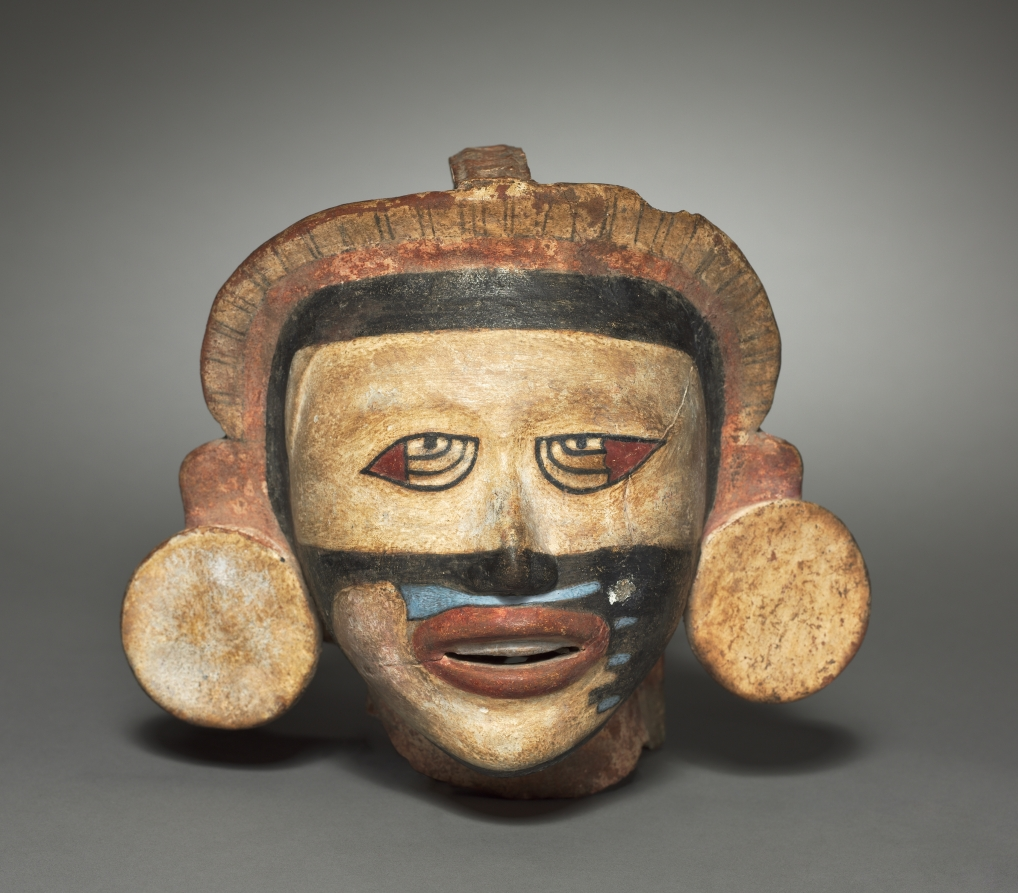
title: Head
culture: Mexico, Classic Veracruz (Totonac or Tajin)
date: 600–1100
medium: pottery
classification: Sculpture